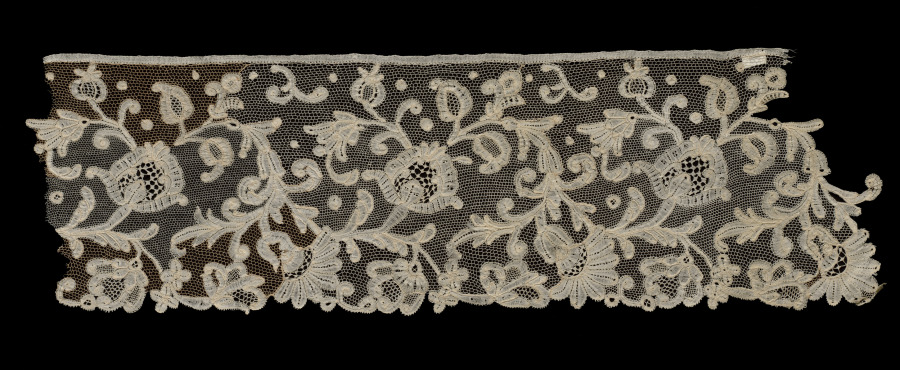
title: Lace Edging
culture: Flanders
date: 1700s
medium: Linen: bobbin lace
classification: Lace